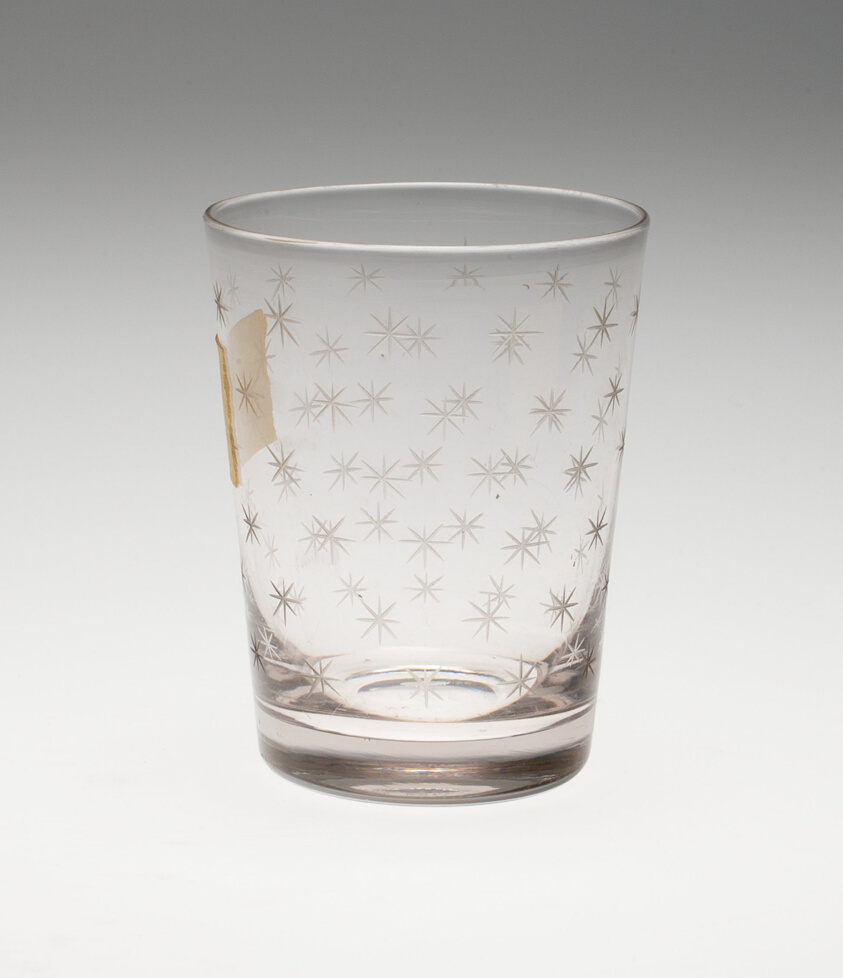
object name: Glass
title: Beaker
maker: England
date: 1800/25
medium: Glass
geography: England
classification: glass; european decorative arts